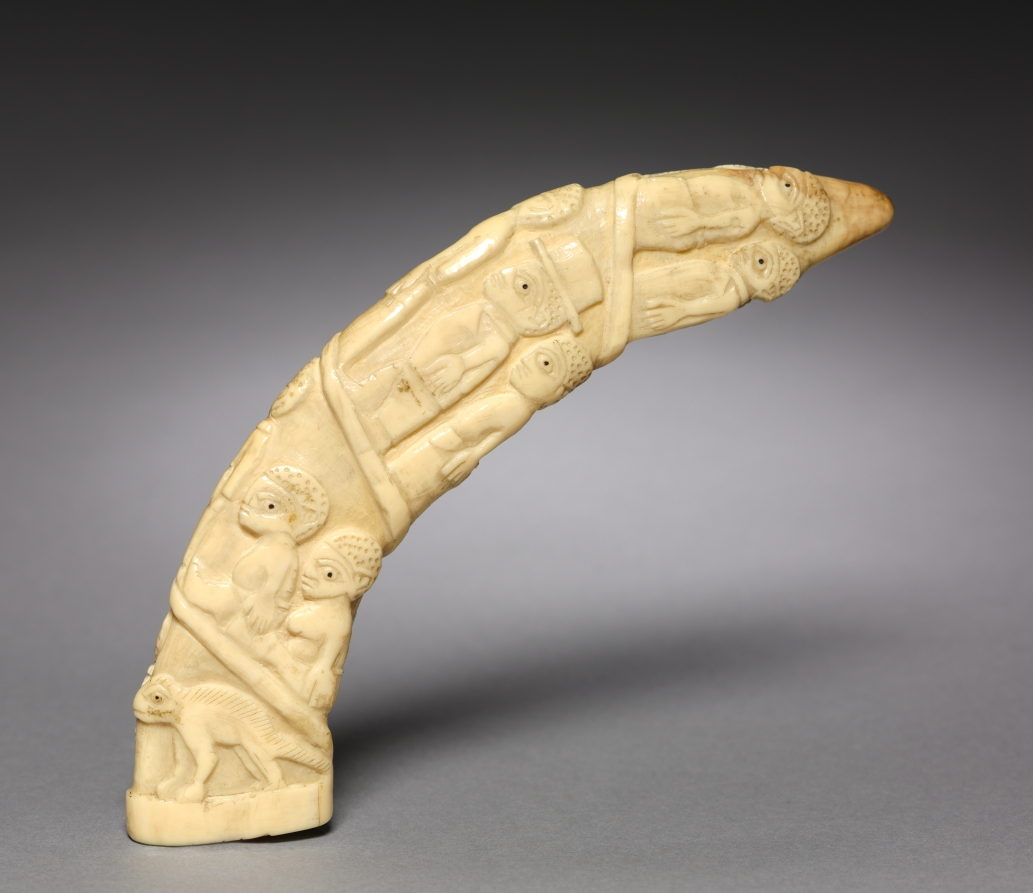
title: Carving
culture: Central Africa, Democratic Republic of the Congo, Kongo, early 20th century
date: c. 1900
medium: ivory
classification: Sculpture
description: Carved elephant ivory tusks and hippopotamus tooth ivory—whether large, or small, like this example—were sought-after souvenirs for Europeans who visited, lived, or worked on the coast of Central Africa. Vili carvers had been sculpting ivory for centuries. In the age of European commerce and colonialism, they created carefully observed tusks with representations of everyday life for European clients. While commissions, they also reflected what the artists chose to represent about their own societies, and sometimes about Europeans. In this small tusk, we see Congolese individuals wearing various clothing, from local-style waist wrappers to European brimmed hats.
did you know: The spiral composition of this artwork has been used on carved ivories in the Kingdom of Kongo since the 1500s.